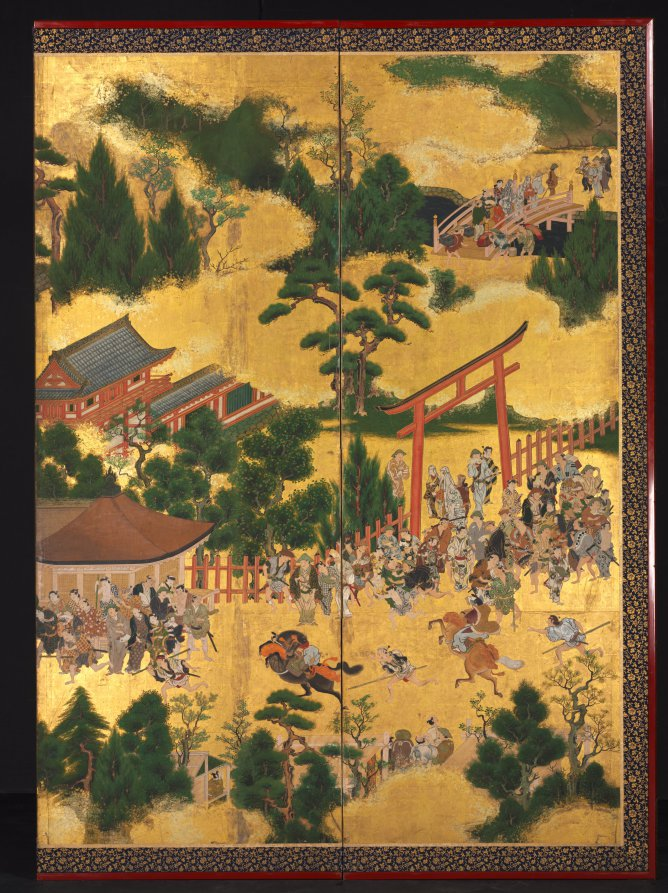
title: Horse Race at the Kamo Shrine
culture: Japan, Edo period (1615–1868)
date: early to mid-1600s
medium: One of a pair of six-panel folding screens; ink and color on gilded paper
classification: Painting